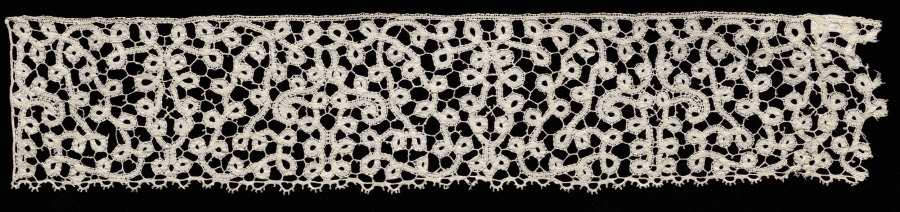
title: Lace Edging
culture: Italy, Milan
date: 1600s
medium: Bobbin lace (bride ground)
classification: Lace